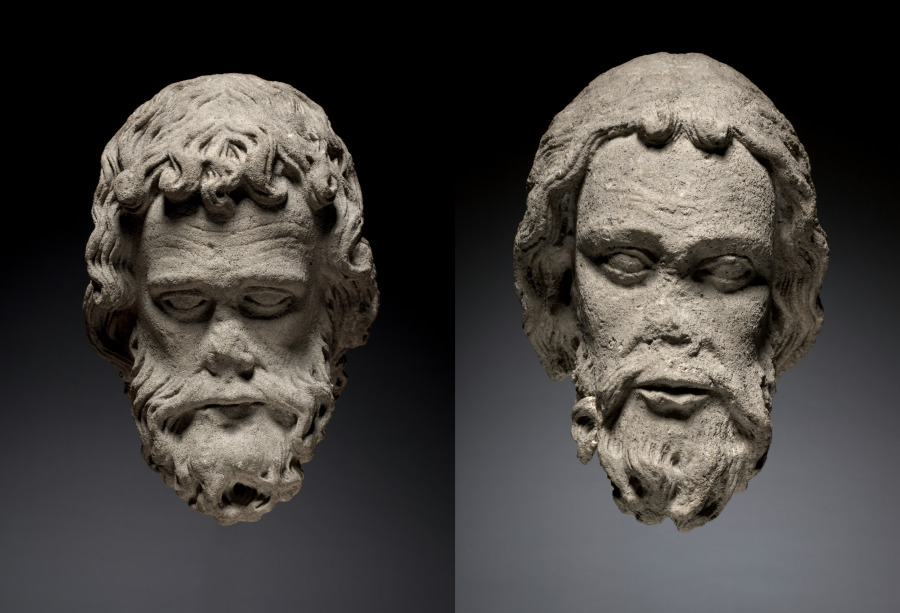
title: Head of an Apostle from the South Portal of the Cathedral of Thérouanne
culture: Northern France (Pas-de-Calais), Thérouanne, 13th century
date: c. 1235–1240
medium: oolitic limestone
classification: Sculpture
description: These monumental stone heads are among the substantial known remains of the sculptural program of Thérouanne’s cathedral, which was razed to the ground by Emperor Charles V of Spain in June of 1553. These heads were found in a wall of rue Ste. Croix in the town of Saint Omer (a short distance to the north) in January 1923. This group of sculptures from the gable of the south portal of Thérouanne, which includes a stylistically related Christ as Judge, is recorded to have been moved to the Cathedral of Saint Omer in 1554. With their deeply carved wavy hair, curly beards, wrinkled foreheads, and ponderous facial features, these imposing heads--even in their now fragmentary and weathered state--attest to the powerful monumentality of the stone sculpture covering French church facades of the Gothic period.